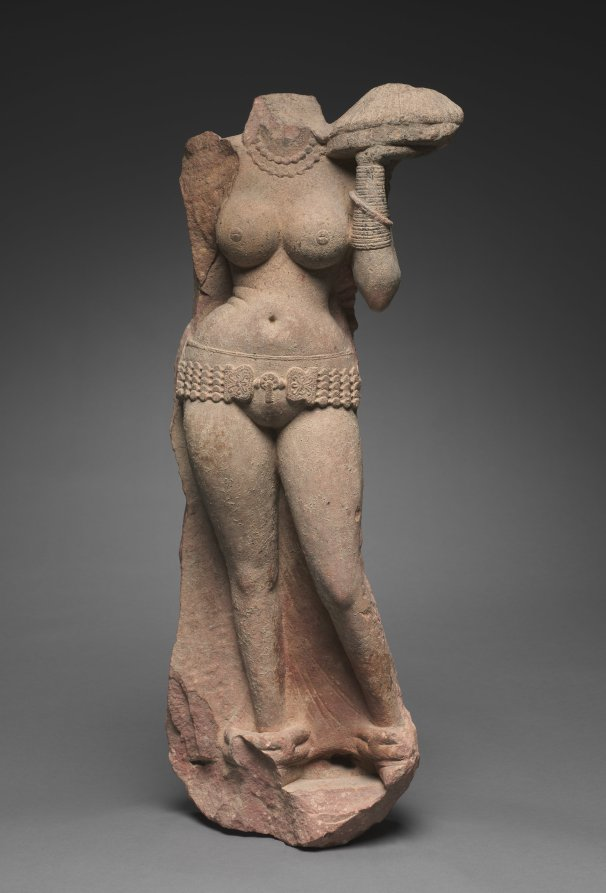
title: Female Devotee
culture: India, Mathura, Kushan period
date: c. early 100s CE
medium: sandstone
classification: Stone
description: This female devotee is depicted approaching the place of worship carrying a covered wicker tray that would have been filled with fresh flower garlands.The sense of dynamism and power in the stance, the masterful transformation of stone into the suppleness of youthful, voluptuous flesh barely interrupted by clothing, as well as touches of naturalism—seen in the slipping of the large bangle down the spiral cuff—are all stylistic characteristics of female figures made during the early 2nd century.